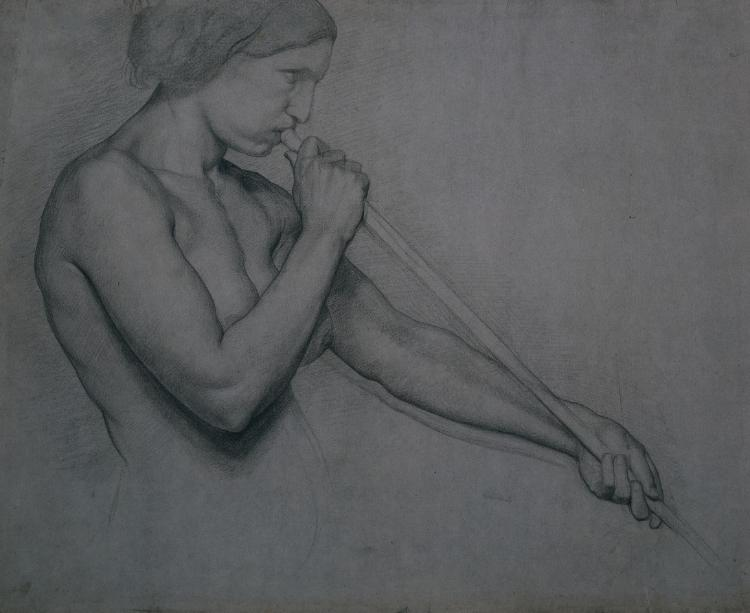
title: Angel Blowing a Trumpet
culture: France, 19th century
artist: Edgar Degas (French, 1834–1917)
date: 1857–59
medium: black chalk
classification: Drawing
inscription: verso, lower right, in graphite: 43 53 / 93 99 [underlined] / 65 75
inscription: lower right, in graphite: [illegible] ppl[illegible] [sumi?] [natural?] T A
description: The figure in this drawing closely resembles a number of trumpeting angels in drawings that Edgar Degas made between 1856 and 1858 in preparation for an ambitious but ultimately unrealized history painting on the subject of Saint John the Evangelist accompanied by an angel. Rather than referring to any single passage in the Book of Revelation, Degas distilled an image from passages describing seven trumpeting angels who unleash destruction on earth with their blasts, the voice of Christ that addresses John in loud tones "like a trumpet," and individual angels who lead and instruct the Evangelist.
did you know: Related studies suggest that the subject is a male model; Degas added breasts almost as an afterthought.